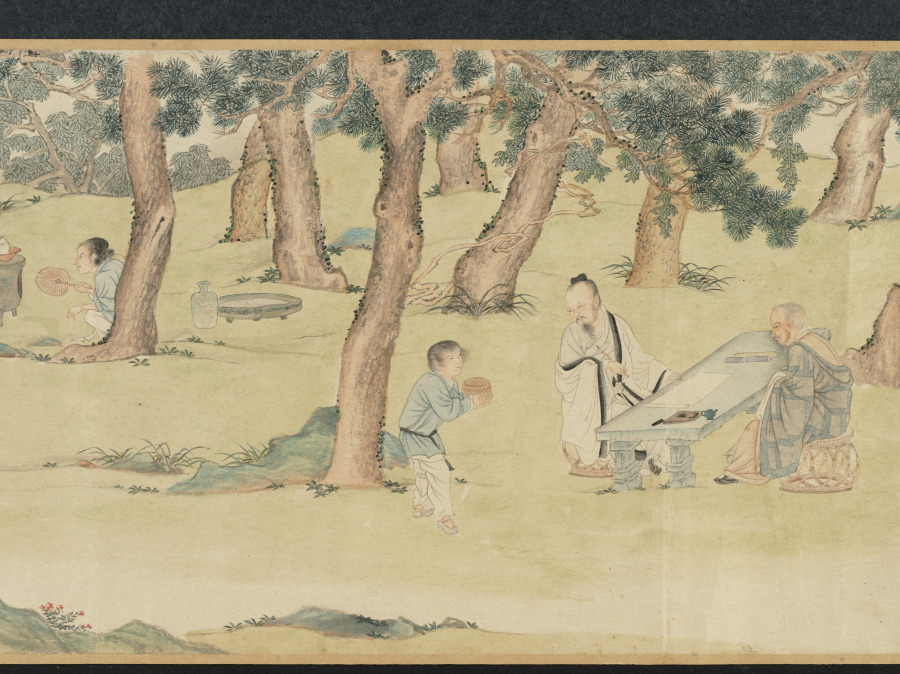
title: Zhao Mengfu Writing the Heart (Hridaya) Sutra in Exchange for Tea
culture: China, Ming dynasty (1368–1644)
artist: Qiu Ying (Chinese, 1494–1552)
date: 1542–43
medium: handscroll, ink and light color on paper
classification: Painting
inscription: Inscription accompanying text of "Heart" sutra, by Wen Zhengming 文徵明 (1470-1559): Zhengming 徵明, written in a boat at Kunshan 崑山, on the twenty-first day of the ninth month, in the renyin 壬寅 year, the twenty-first year of the Jiajing era [1542].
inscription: Colophon by Wang Shih-mou: Chou Yü-shün [Feng-lai] of K'un-shan was a scholarly, refined connoisseur of antiquities. He had acquired the poem written by Chao Ch'eng-chih [Chao Meng-fu] about the exchage of tea for Chao's calligraphy of the Prajna sutra. But the sutra itself, also written by Chao Meng-fu, is lost. He therefore asked Ch'iu Shih-fu [Ch'iu Ying] to do a painting and had Wen Cheng-ming, the artist-in-attendance, write the Hridaya Sutra in the "small, regular" style for replacement. Both works are so excellent that even Chao Meng-fu himself would certainly applaud if he should be reborn to see them. I, Shih-mou, had gotten possession of this scroll from the family of Chou Yü-shün, and since it was so wonderfully matched with one of the treasures in my collection. the Hridaya Sutra written by Chao Meng-fu for Priest Li in "running script," like the reuniting of two halves of a jade pi, I completed the scroll with the several colophons written for the "tea-exchange" poem. I did this because the painting of Ch'iu Ying and the calligraphy of Wen Cheng-ming are definitely masterpieces by themselves with absolutely no need to depend on any of the colophons written for the Chao Meng-fu poem. Furthermore, the two sons of Wen Cheng-ming, Shou-ch'eng [Wen P'eng] and Hsiu-ch'eng [Wen Chia]. have each written a colophon explaining the reason for replacing the calligraphy. As their writings are both acceptable for high standard, I didn't want to throw them away. [So by separating these into two scrolls] I was able to get two complete works of art in one clever stroke. I was quite pleased with myself, and hope that those who see this scroll shall not get suspicious because of the missing colophons. Wang Shih-mou wrote in his Jih-sun-chai study, on the first day of the tenth month, in the chia-shen year of the Wan-li era [1584].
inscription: Colophon by Wen P'eng: I-shao [Wang Hsi-chi] wrote in exchange for a flock of geese. Su Tung-po wrote in exchange for meat. Both episodes have become legends of a thousand years. Sung-hsüeh [Chao Meng-fu] "teased" Priest Kung for tea, and the story was immediately immortalized in the poems by all the famous scholars of the times. Indeed, how could one say his humor and elegance are not equal to the ancient worthies? Unfortunately, the poetry has survived but the writing of the sutra is lost. Yü-shün [Chou Feng-lai] therefore asked my father to make up the writing and so here is the complete work of art. Respectfully inscribed by Wen P'eng in the mid-summer of 1543.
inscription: Colophon by Wen Chia: Sung-hsüeh [Chao Meng-fu], in exchanging tea leaves for his writing of the Prajna, had put himself in the company of Yu-chün [Wang Hsi-chih] who exchanged geese for his writing of the Huang-t'ing sutra [the Yellow Chamber, or the Wai-ching ching, a Taoist text attributed to the Yellow Emperor]. However, was this romantic and cultivated gesture really intended for such small things? Actually, he was only proud that the excellence of his calligraphy had made him worthy to be the successor of the Ch'in Dynasty master. Since, very unfortunately, Chao Meng-fu's writing [of the Prajna] was already lost, my father therefore agreed to replace it, and did the calligraphy in the style of the Yellow Chamber. In addition, Yu-shün [Chou Feng-lai] had asked Mr. Ch'iu Shih-fu [Ch'iu Ying] to do a painting of the sutra writing story in the style of Li Lung-mien at the head of the scroll. Now it would seem the entire episode should go down in history for immortality. Respectfully recorded by Wen Chia, on the eighth day of the eighth month, in the year of k'uei-mao [1543]. trans. WKH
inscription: 4 colophons and 23 seals: 1 colophon, dated 1543, and 2 seals of Wen Peng (1498-1573); 1 colophon, dated 1543, and 2 seals of Wen Chia (1501-1583); 1 colophon, dated 1584, and 3 seals of Wang Shih-mou (1536-1588); 2 seals of Chou Feng-lai (16th c.); 3 seals of Sung Lo (1634-1713); 5 seals of the Ch'ien-lung emperor (r. 1736-95); 1 colophon, dated 1902, and 1 seal of Fei Nien-tz'u (1885-1905); 4 seals of Wan-go H. C. Weng (b. 1918); 1 seal unidentified.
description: The Yuan dynasty calligrapher Zhao Mengfu (1254–1322) is said to have transcribed the Heart Sutra for a certain priest named Li in exchange for tea. Later, during the Ming dynasty, the professional painter Qiu Ying from Suzhou painted this scene for his patron. Here, Zhao Mengfu holds a brush and has a piece of paper laid out before him. On the table is an ink stone, an ink stick, and a small water dropper. Drops of water would dissolve the ink stick into liquid ink when it was ground on the flat square stone.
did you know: Qiu Ying was born to a peasant family, but his natural talent led him to a successful career as a professional painter with wealthy patrons.